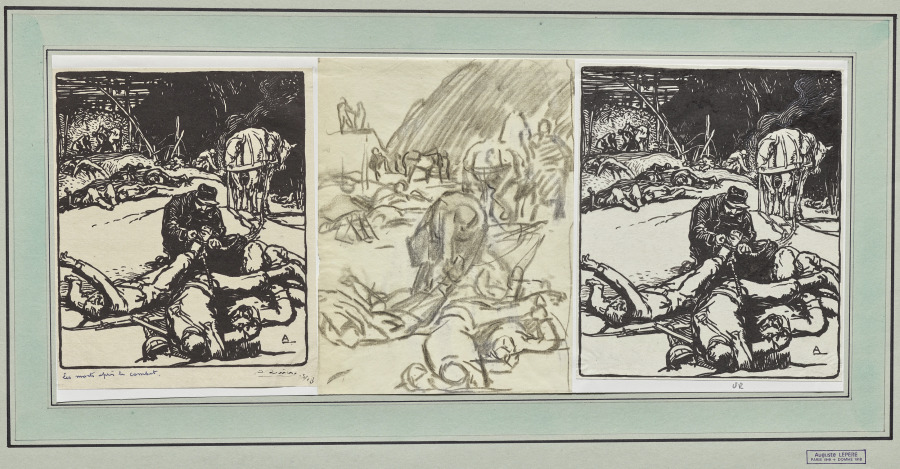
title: Les Morts après le combat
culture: France, 20th century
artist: Auguste Louis Lepère (French, 1849–1918)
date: 1914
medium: black chalk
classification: Drawing